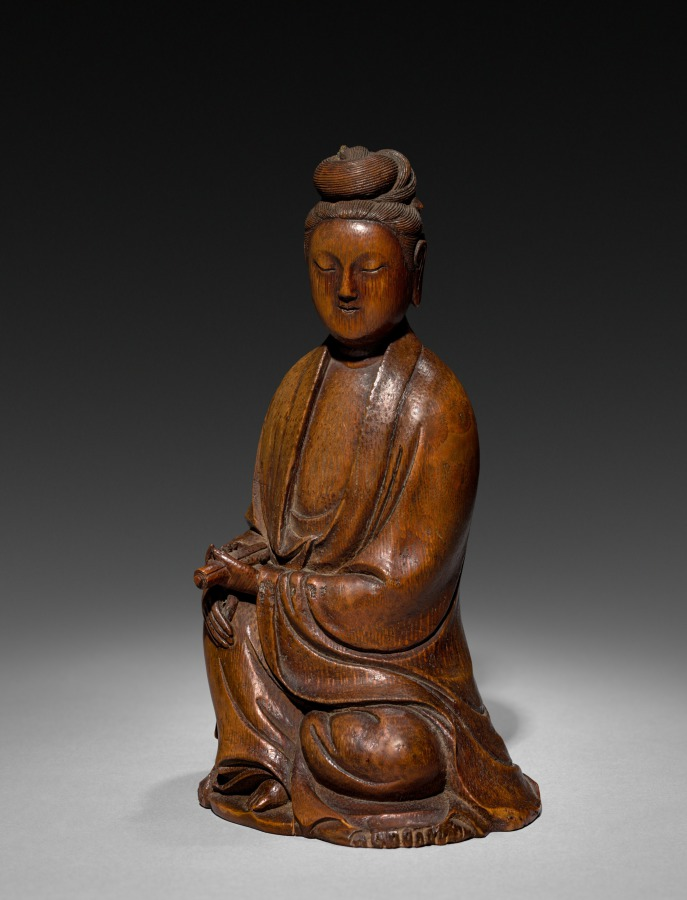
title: Seated Guanyin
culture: China, Qing dynasty (1644-1911)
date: 1600s-1700s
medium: bamboo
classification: Wood